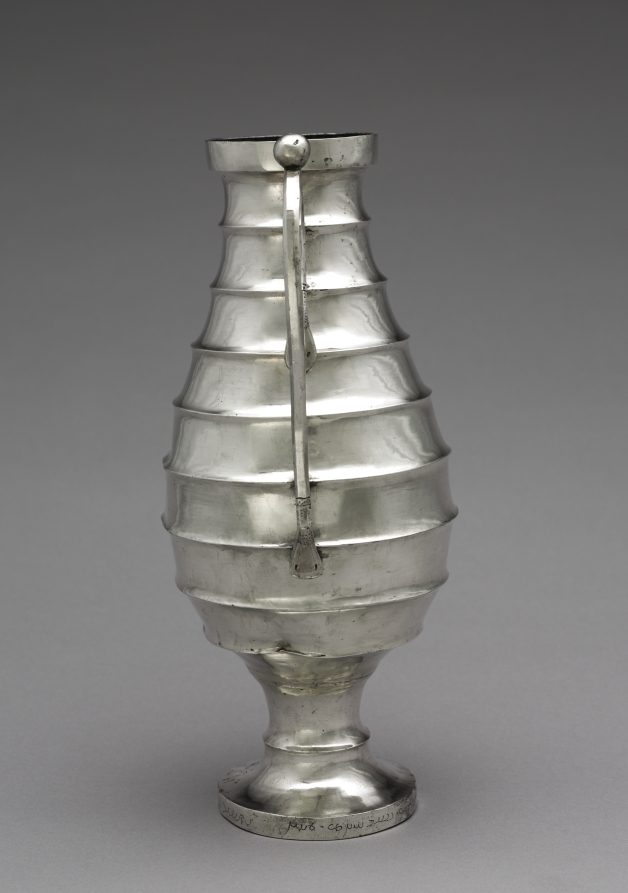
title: Stepped Pitcher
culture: Iran, Sasanian Empire (224–651 CE)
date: 400–600 CE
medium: silver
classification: Metalwork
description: The Sasanians are best known today for their expert work in silver. This museum is fortunate to have one of the most important collections of Sasanian silver vessels in the world.